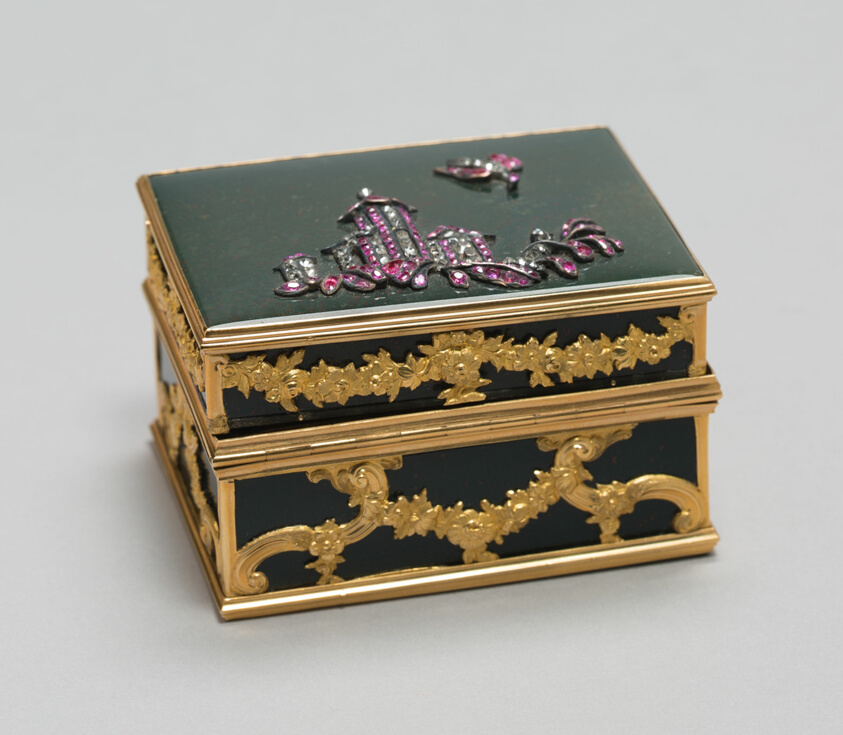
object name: Metalwork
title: Neccessaire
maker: London, England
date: Mid 18th century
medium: Wood, mirror glass, and crystal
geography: England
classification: snuff box; european decorative arts; metalwork